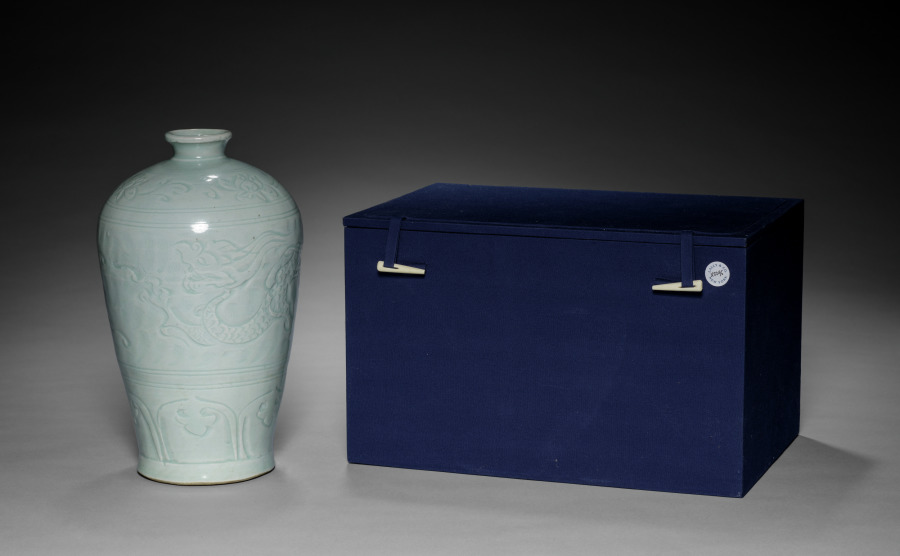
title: Meiping Vase with carved Dragon Motif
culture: South China, Yuan dynasty (1279–1368)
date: 1300s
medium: Porcelain with pale bluish-white (qingbai; 青白) glaze and carved decoration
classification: Ceramic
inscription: There are multiple self-adhesive labels on the bottom: 1. Square white (now yellowed with age) label with "90" written in red ink. 2. White rectangular label with "L.80.17.8" written in pencil. 3. Fabric tape cut to rectangular shape with "L.2161.49 /39" written in black ink. 4. White round label from Lally & Co. New York with "X2295" written in black ink.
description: A fierce coiling dragon chasing a pearl amid mist and clouds—a symbol of fertility and power—decorates this sturdy vase. Its shoulder is incised with a band of lotus flowers and the base features a border of lotus petals. Meiping, literally prunus vase, derives its name from being used to display a single floral spray, traditionally a branch of blossoming plum (or prunus), apricot, or cherry.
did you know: In Chinese mythology, the dragon is believed to transport human souls to the heavens after death.